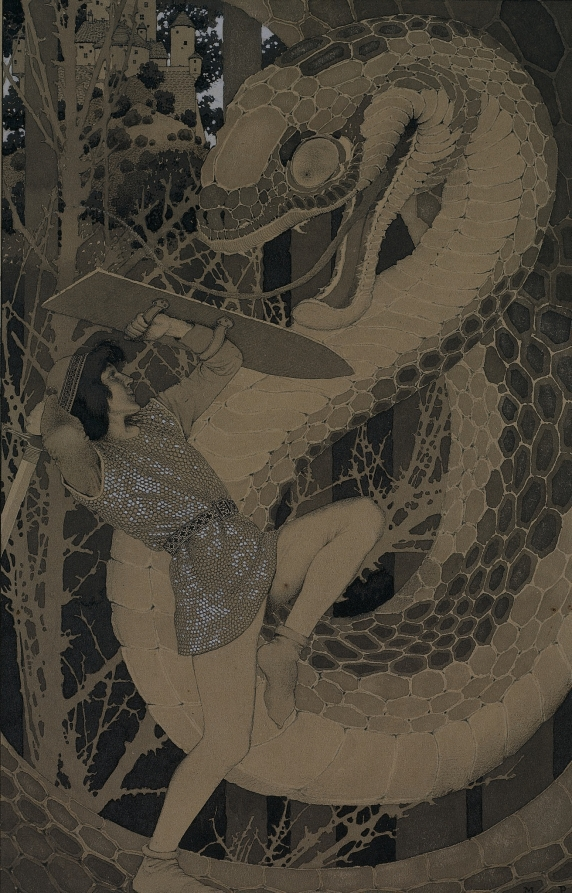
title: Alarums and Excursions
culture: America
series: The Golden Age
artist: Maxfield Parrish (American, 1870–1966)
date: 1899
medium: brush and black and gray wash, with white gouache, over graphite, framing lines in pen and black ink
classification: Drawing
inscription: signed in image, lower right, in black watercolor: M . P; lower left, by artist, across bottom margin, in graphite: "Alarums and Excursions." . . . Once again were damsels rescued, dragons / disembowelled, and giants . . . etc.; verso, by artist, in top half: no. 225 [inside a box] / Maxfield Parrish. / "The Oaks" / Windsor: Vermont. / June of 1899.; on fragment of old mount, now removed, in brown ink: Original pen + ink drawing by Maxfield Parrish. / Being one of the illustrations of "The Golden Age" / by Kenneth Grahame (John Lane Co. 1899); on fragment of old mount, now removed: B[ought?] of Frd'k Keppel Co. / 1899-$50-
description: Alarums and Excursions is one of nineteen illustrations the young Maxfield Parrish created for Kenneth Grahame’s The Golden Age, a children’s book published in 1899. In the chapter Alarums accompanies, the narrator persuades a friend to join him in a make-believe of Arthurian legends. Parrish depicted one of the boys in the midst of their playful fantasy, as he prepares to strike an enormous, coiled serpent. Parrish rendered the scene in crisp detail, using flat, delicate washes of monochrome ink, strong linear contours, and scintillating pricks of white gouache on the boy’s chainmail. Parrish’s designs found mainstream success in a variety of print media, making him one of the best-known illustrators of the 20th century.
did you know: Parrish employs a technique called sgraffito (“to scratch”) on the serpent’s tongue, producing its mottled texture by scraping away the upper layer of paper.